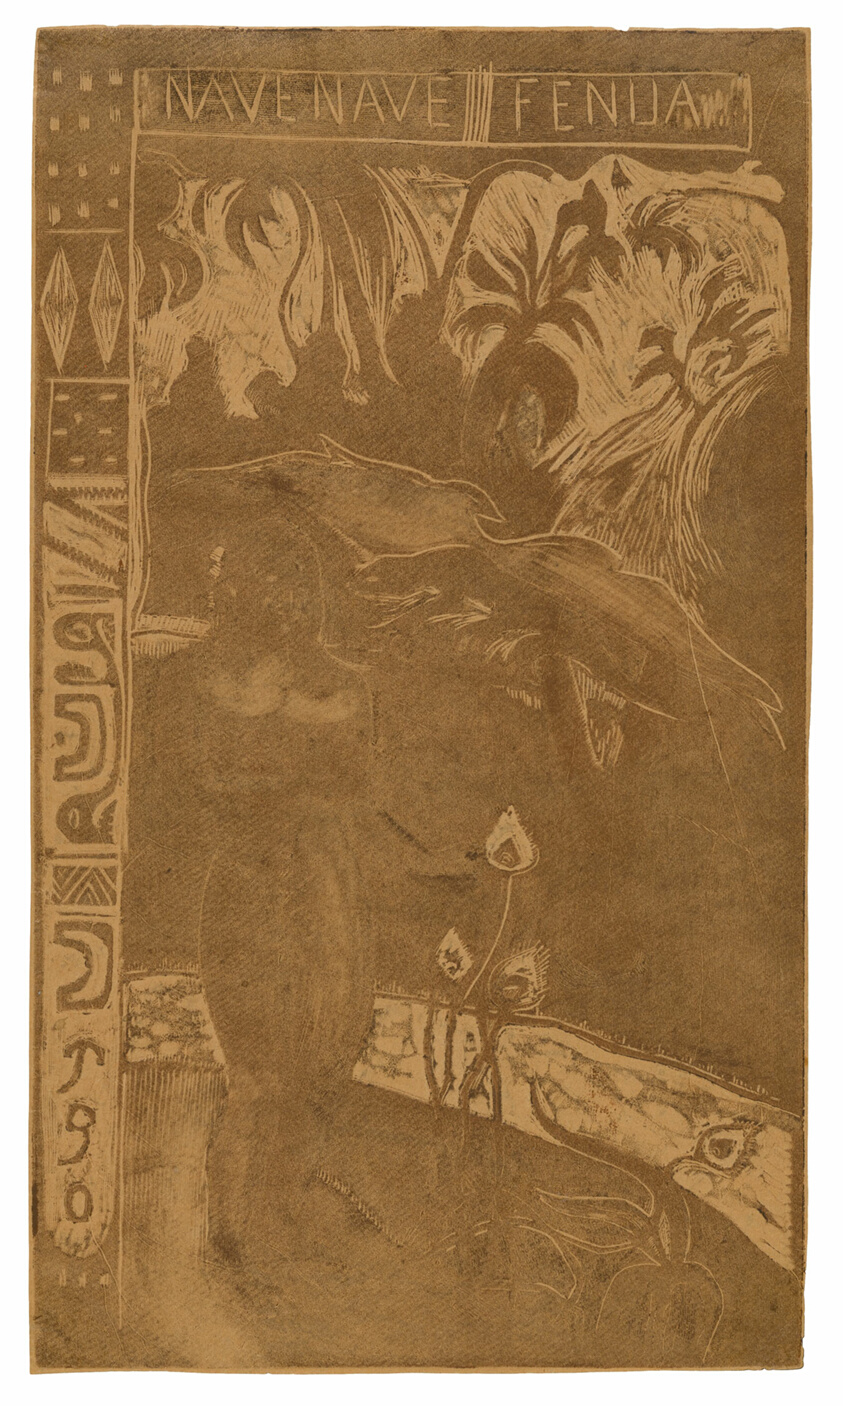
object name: Print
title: Nave nave fenua (Delightful Land), from the Noa Noa Suite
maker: Paul Gauguin (French, 1848-1903)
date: 1893–94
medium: Wood-block print in residual brown and black inks, with selective wiping, a transferred twill impression, and touches of hand-applied dark brown ink, on thin, pale-pink wove paper (faded to tan)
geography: France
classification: woodcut; print; prints and drawing